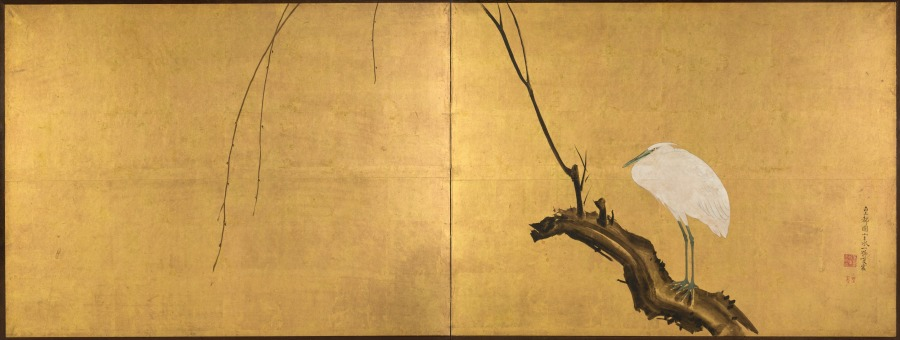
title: Heron on a Willow Branch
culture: Japan, Edo period (1615–1868)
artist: Maruyama Ōkyo (Japanese, 1733–1795)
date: late 1700s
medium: Two-panel folding screen; ink, color, lacquer, and gold on silk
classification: Painting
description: Okyo was the most influential painter and teacher of his time in Kyoto. His mastery of brush and ink found expression in a variety of Chinese and Japanese subjects, painting styles, and formats. This depiction of a heron on a willow branch is done in a classical Japanese painting (yamato-e) style, utilizing flat areas of colorful pigments set against an expansive background with little or no spatial depth.